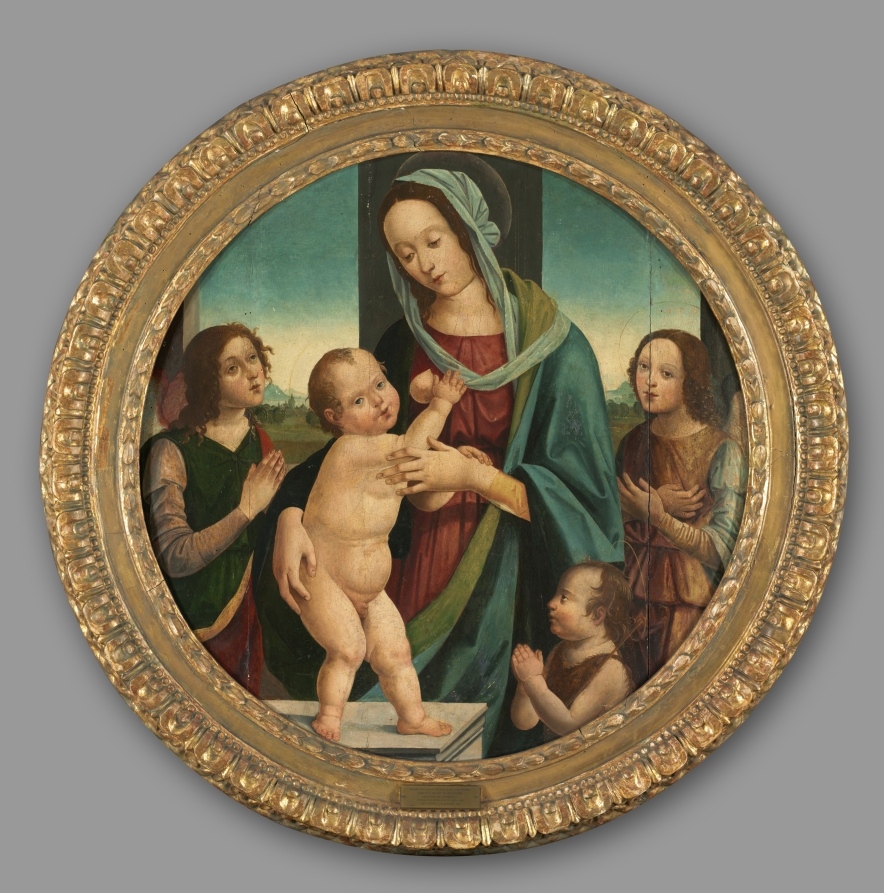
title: Virgin and Child with John the Baptist and Angels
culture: Italy, early 16th Century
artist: Pietro del Donzello (Italian, 1452–1509)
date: c. 1500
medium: oil on wood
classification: Painting